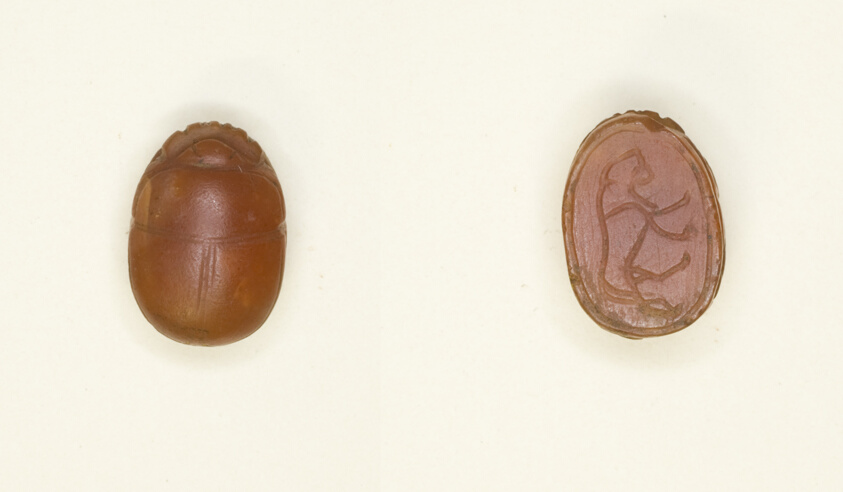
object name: Costume and Accessories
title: Scarab: Striding Lion Motif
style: new kingdom, eighteenth dynasty, ancient, egyptian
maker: Egyptian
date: New Kingdom, Dynasties 18 (about 1550–1295 BCE)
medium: Carnelian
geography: Egypt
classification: scarab; stone; ancient art; costume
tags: scarab beetle, lions